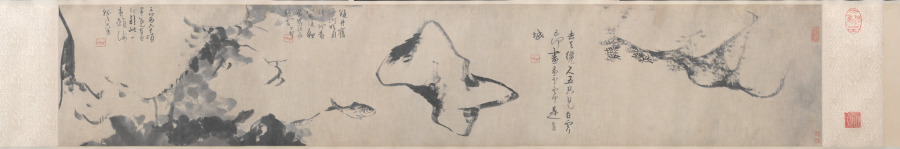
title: Fish and Rocks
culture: China, Qing dynasty (1644-1911)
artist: Bada Shanren (Chinese, 1626–1705)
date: mid- to late 1600s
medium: Handscroll; ink on paper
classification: Painting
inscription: 去天纔尺五，只見白雲行。 云何畫黃花，雲中是金城。 [印] 个山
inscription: 雙井舊中河，明月時延佇。 黃家雙鯉魚，為龍在何處。 [印] 个山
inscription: 三萬六千頃，畢竟有魚行。 到此一黃頰，海潮次上笙。 [印] 个山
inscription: 5 additional seals: 2 of Zhang Daqian 張大千 (1899–1983); 1 of Ta-an Chü-shih; 2 unidentified.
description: Bada Shanren, also called Zhu Da, a 17th-century painter who rejected conventions in favor of an individual, personal expression, is known for his unorthodox compositions of fish, flowers, birds, and rocks. Fish in his paintings are often looking upward toward heaven, swimming in a pond of undefined space. As a member of the Ming imperial family, Zhu Da lost his princely status and hid in a monastery when the Manchus, foreigners from the north, established the Qing dynasty in 1644. This scroll may have some autobiographical meaning, representing fish as leftover subjects (yimin) who lived in a void, having lost their roles in life after the fall of the dynasty.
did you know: After each poem, Bada Shanren used his so-called jixingyin seal 屐形印, which resembles the impression of a shoe on soft mud.